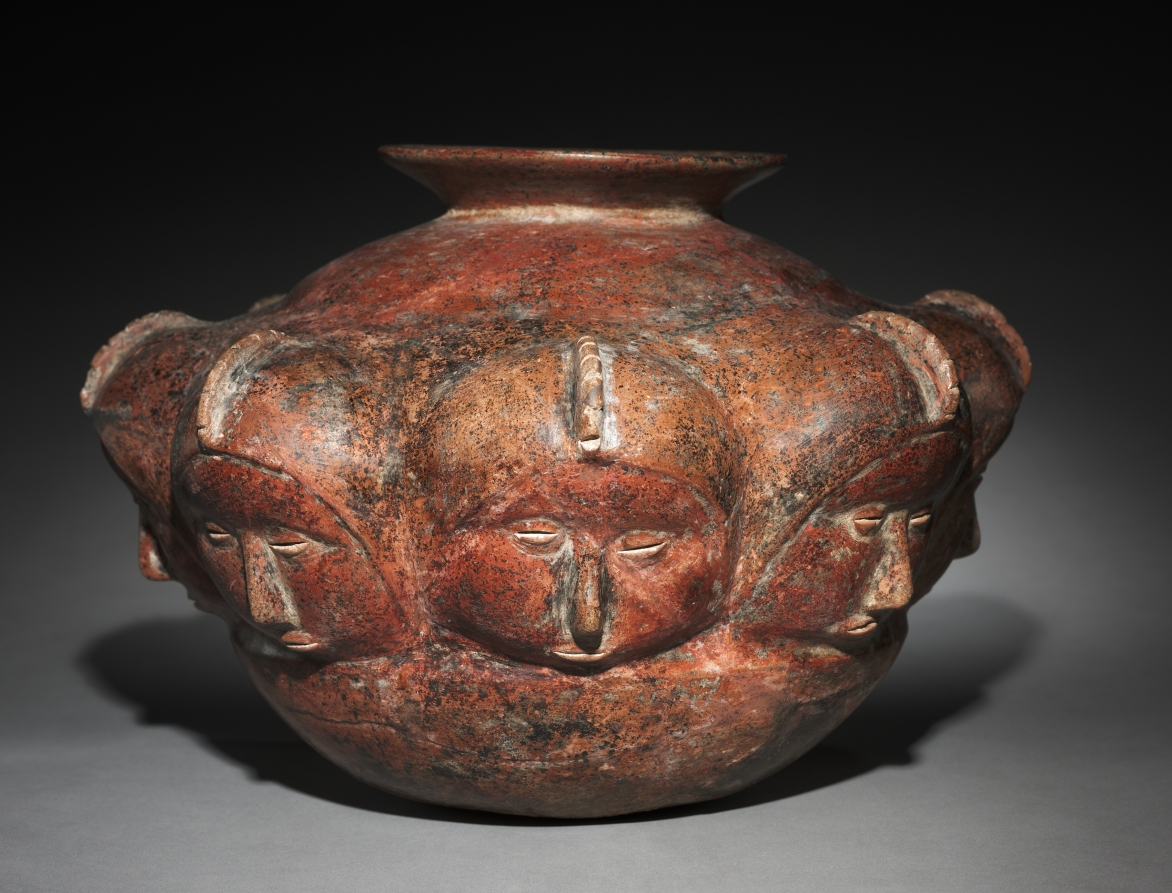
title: Vessel with Crested Heads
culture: West Mexico, Colima, Comala style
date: 200 BCE–300 CE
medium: earthenware with colored slip, black burial deposits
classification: Sculpture